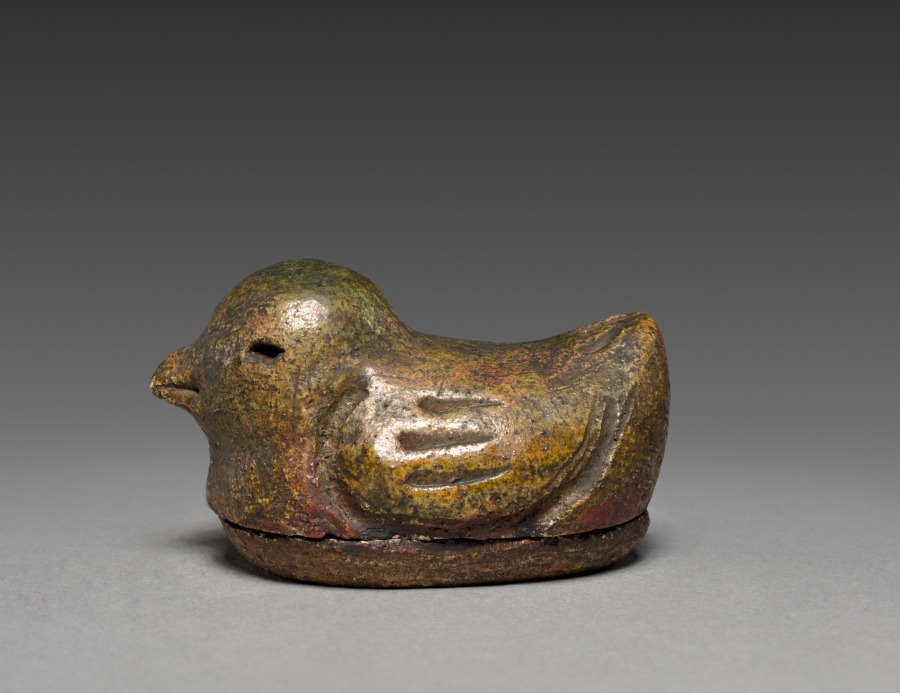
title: Incense Container (Kōgō) in the Shape of a Bird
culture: Japan, Edo period (1615–1868)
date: c. 1700–1868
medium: Stoneware with glaze and carved decoration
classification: Ceramic